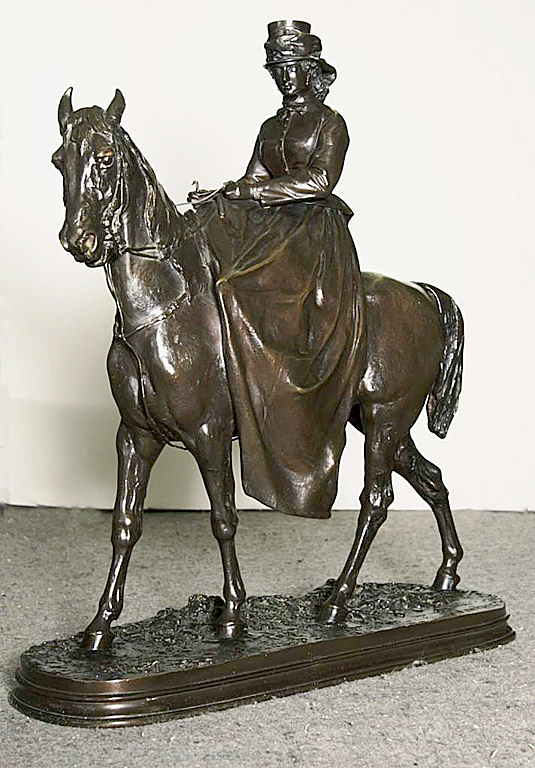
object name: Sculpture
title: Amazon: Mme. L. Riding Monte Cristo, Pure-Bred English Horse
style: nineteenth century, 19th century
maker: Pierre Jules Mêne (French, 1810–1879)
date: 1865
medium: Bronze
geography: France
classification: statuette; sculpture; figure; french; portrait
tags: woman, portraits: female subject, portraits, portrait, animals, horse